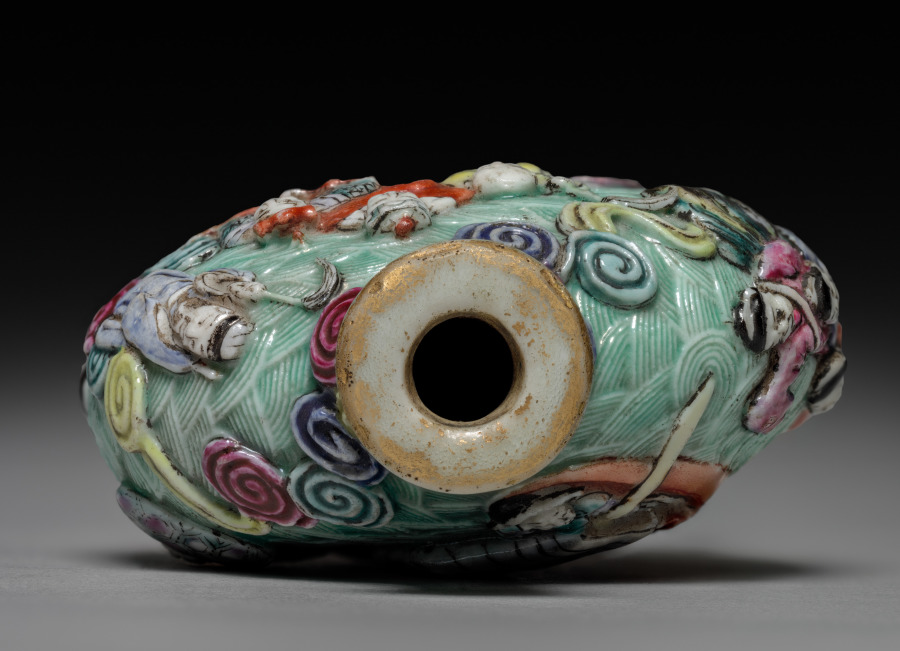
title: Flattened Ovoid Snuff Bottle with Stopper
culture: China, Qing dynasty (1644-1911), Jiaqing reign (1796-1820)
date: 1796–1820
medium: porcelain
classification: Ceramic